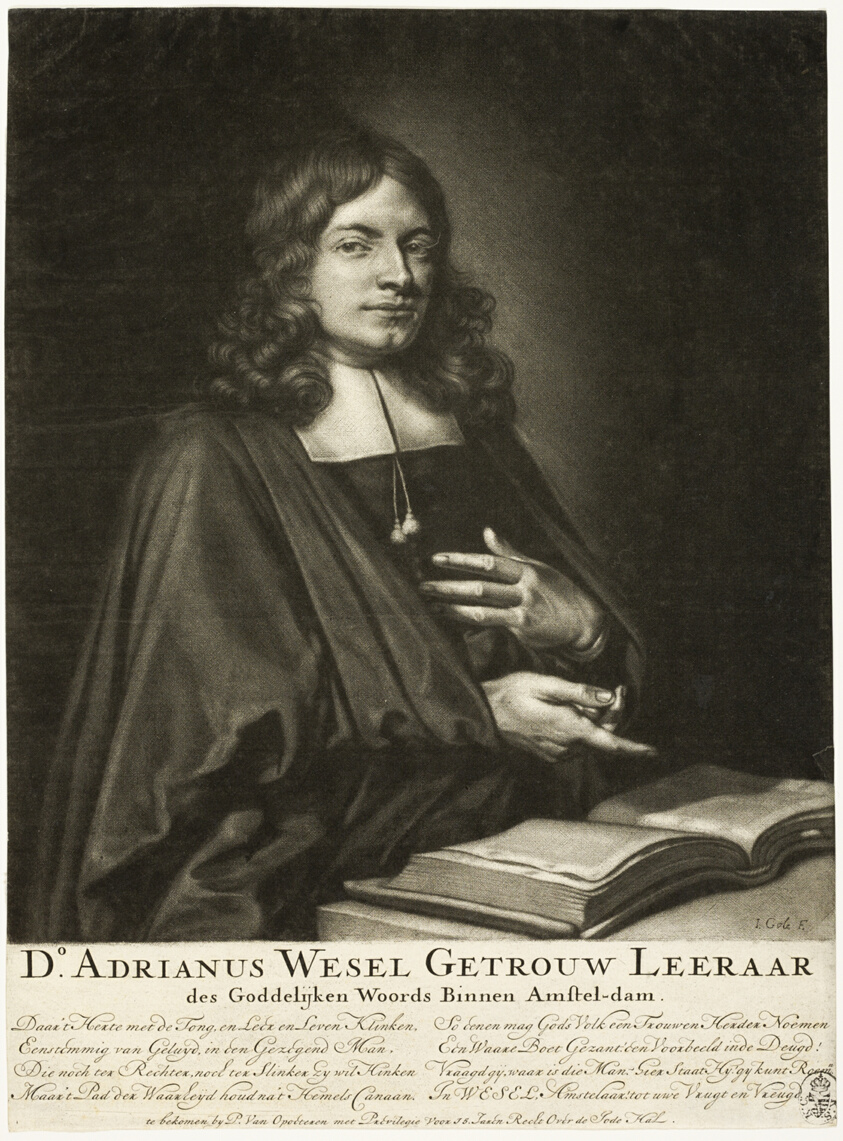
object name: Print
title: Adrian Wesel, Cleric in Amsterdam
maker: Jacob Gole (Dutch, c. 1660-1737)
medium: Mezzotint on ivory paper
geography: Netherlands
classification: mezzotint; print; prints and drawing